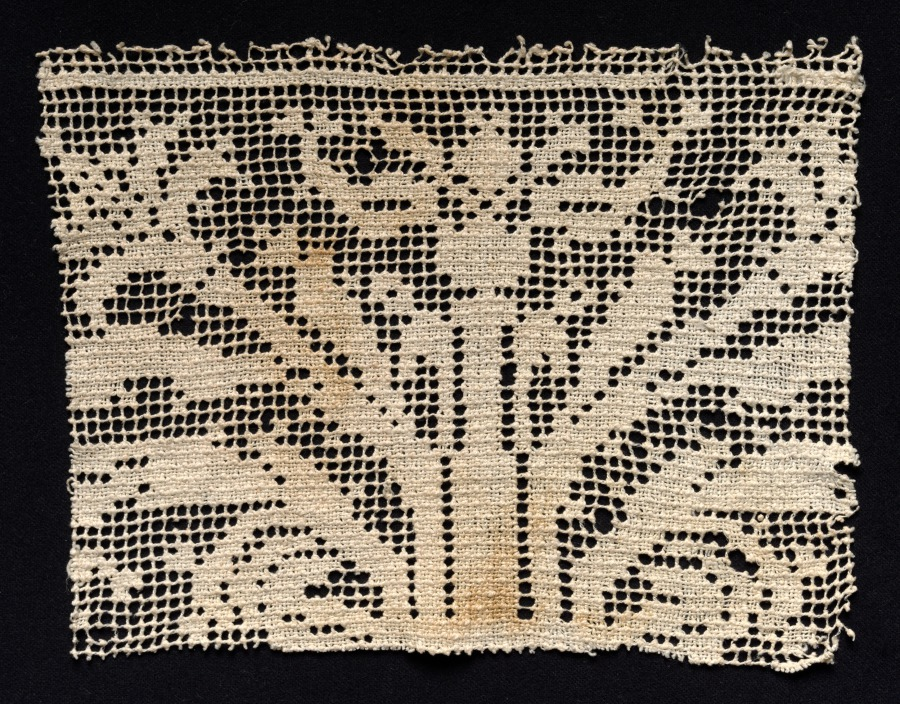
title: Fragment of a Band with Branching Vegetation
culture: Spain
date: 1600s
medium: Bleached linen (est.): needle lace, filet/lacis (knotted ground and darned in two directions)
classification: Lace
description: Budding vegetation or a tendril motif is a recurring pattern in needle lace. The frequent use of the motif, adapted in lace from different centuries and regions, suggests that it was found in a pattern book.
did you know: Myrta Leonora Jones, the donor of this work, was a women’s rights activist in Cleveland in the early 20th century.